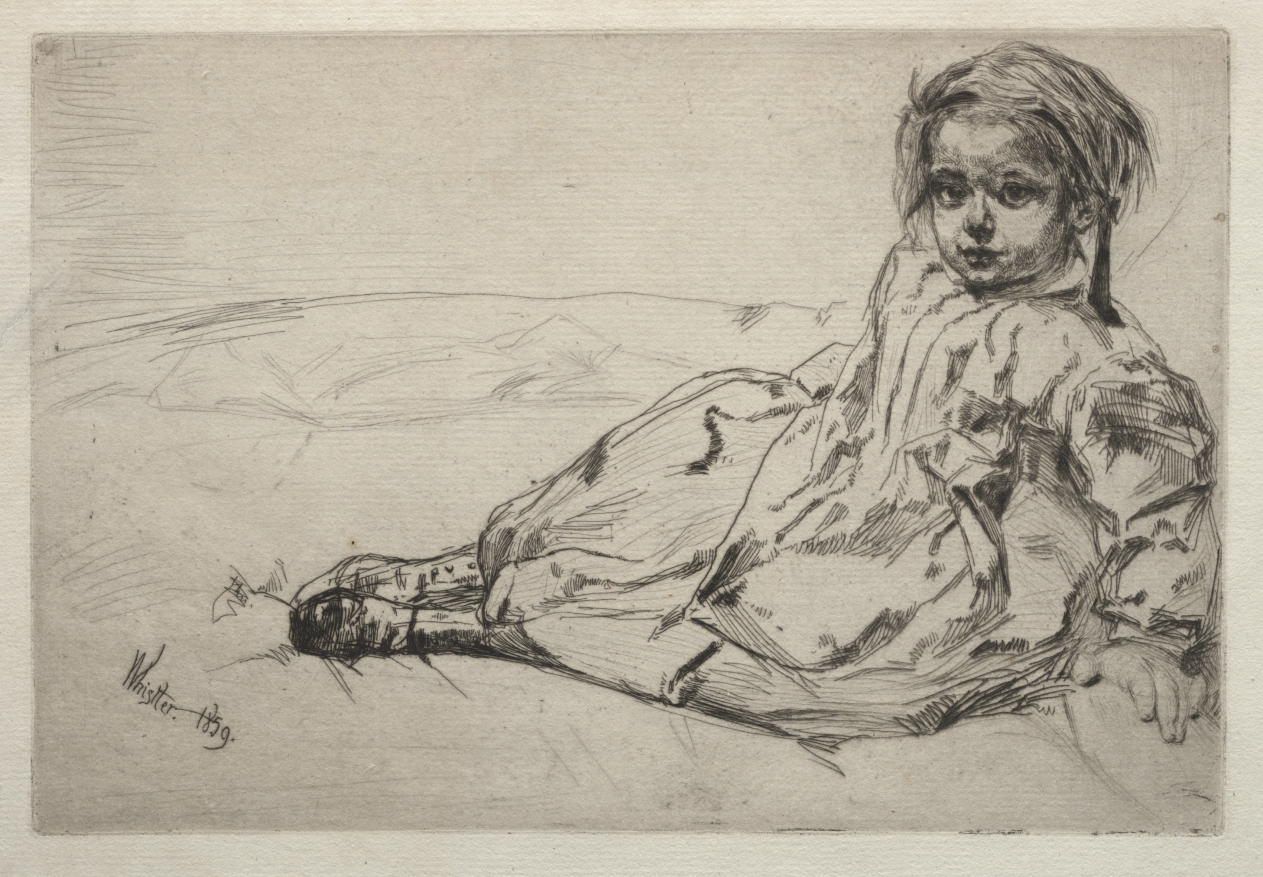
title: Bibi Valentin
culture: America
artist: James McNeill Whistler (American, 1834–1903)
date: 1859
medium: etching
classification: Print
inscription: signed lower left on plate: Whistler 1859